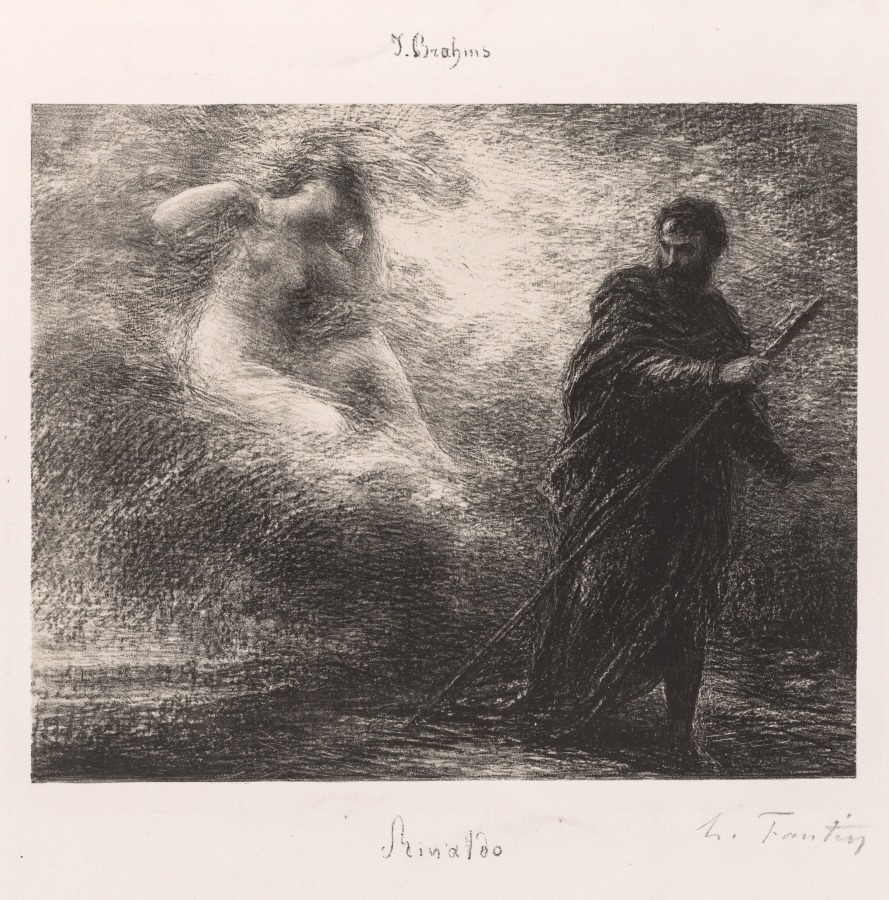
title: Rinaldo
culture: France, 19th century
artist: Henri Fantin-Latour (French, 1836–1904)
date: 1881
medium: lithograph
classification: Print